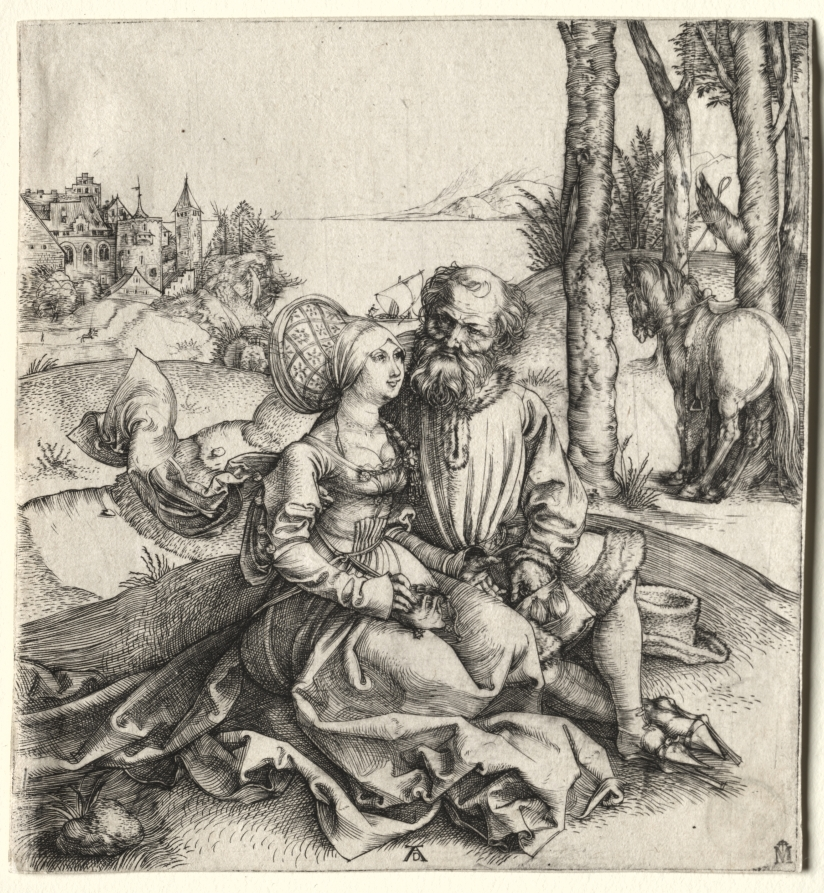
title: The Offer of Love (or the Ill-Assorted Couple)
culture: Germany, late 15th Century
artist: Albrecht Dürer (German, 1471–1528)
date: 1495–96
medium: engraving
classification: Print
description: Dürer’s early engraving of "unequal lovers" plays on a prevalent theme in northern European art in which a young woman seduces a much older man in order to steal his money. Dürer departed from standard representations of the subject and portrayed the male figure in his engraving as a willing participant, paying for the services he’s about to receive. Although scenes of unequal lovers often carry moralizing messages about the dangers of women, the idyllic setting of this image and the seemingly familiar transaction between prostitute and patron suggest a more complex situation beyond simple carnal desire.